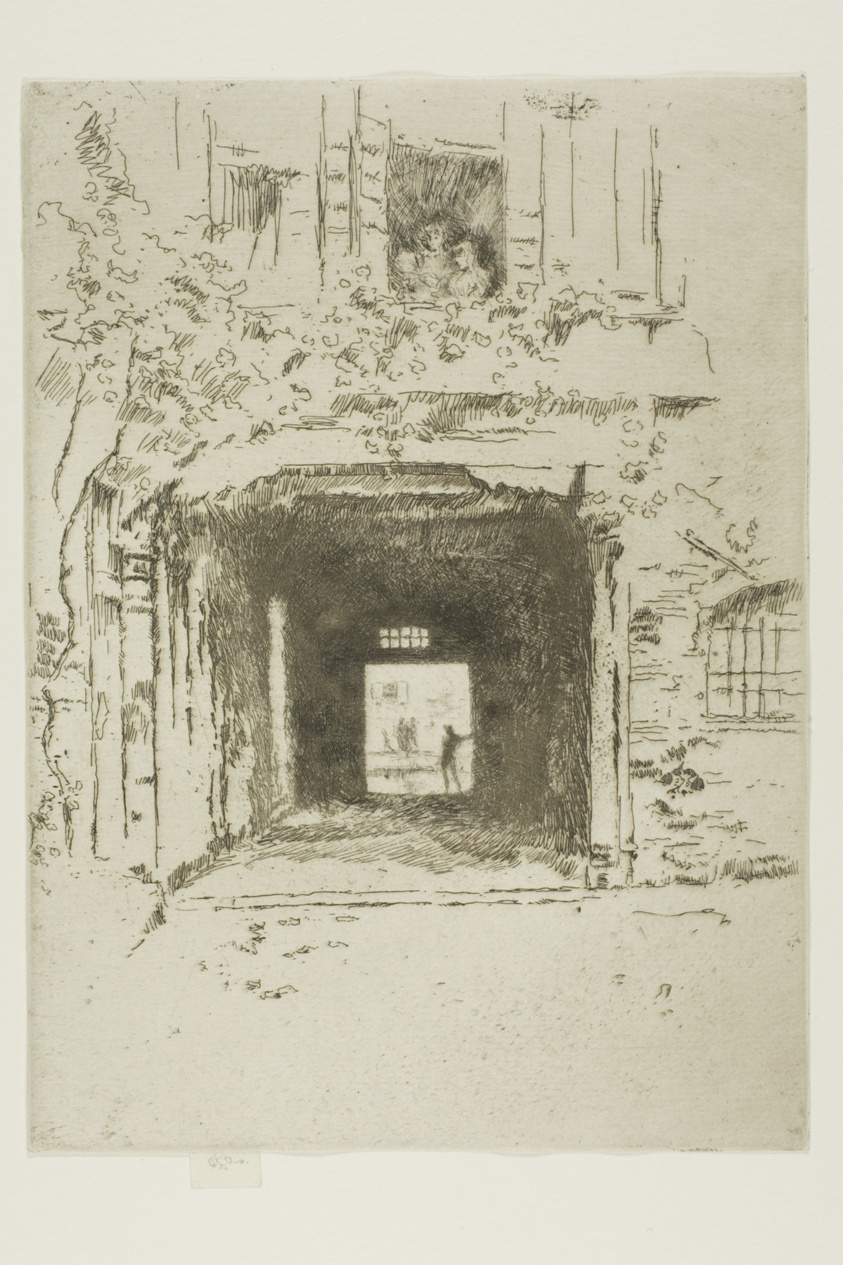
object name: Print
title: Doorway and Vine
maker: James McNeill Whistler (American, 1834-1903)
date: 1879/80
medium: Etching and drypoint with foul biting in black ink on ivory laid paper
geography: United States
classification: etching; foul biting; print; prints and drawing; paper; drypoint